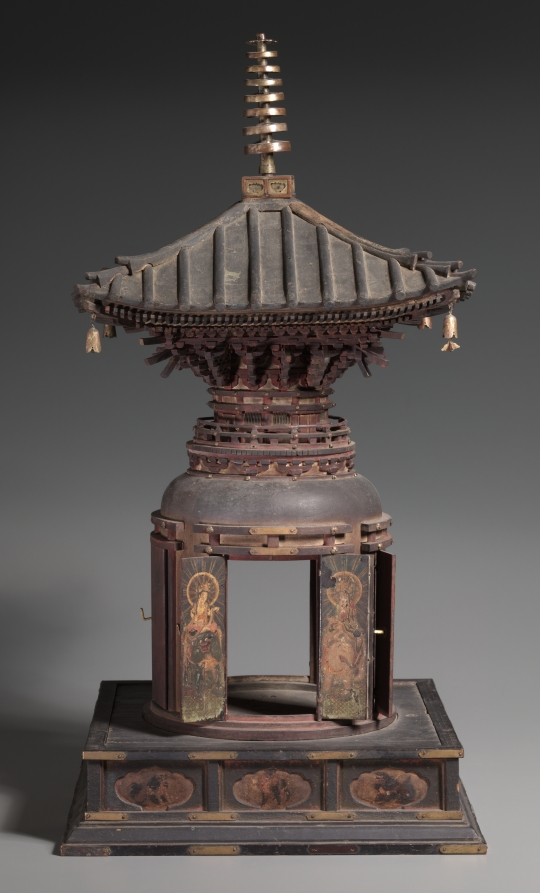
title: Many-Jeweled Stupa Reliquary (Tahōtō shari yōki)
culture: Japan, Kamakura period (1185–1333)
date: early to mid-1300s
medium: wood and metal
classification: Sculpture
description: Earthen mounds that marked the sites of interred relics in ancient India are called stupas. As Buddhism traveled through East Asia, the mounds took on the form of towers called “pagodas” by Westerners. This miniature tower, painted with Buddhist deities on the interiors of the doors on each side, likely once held items considered to be sacred relics. The deities on the doors have been tentatively identified as the four bodhisattvas of the sacred text the Lotus Sutra, and two Guardian Kings known as Niō.